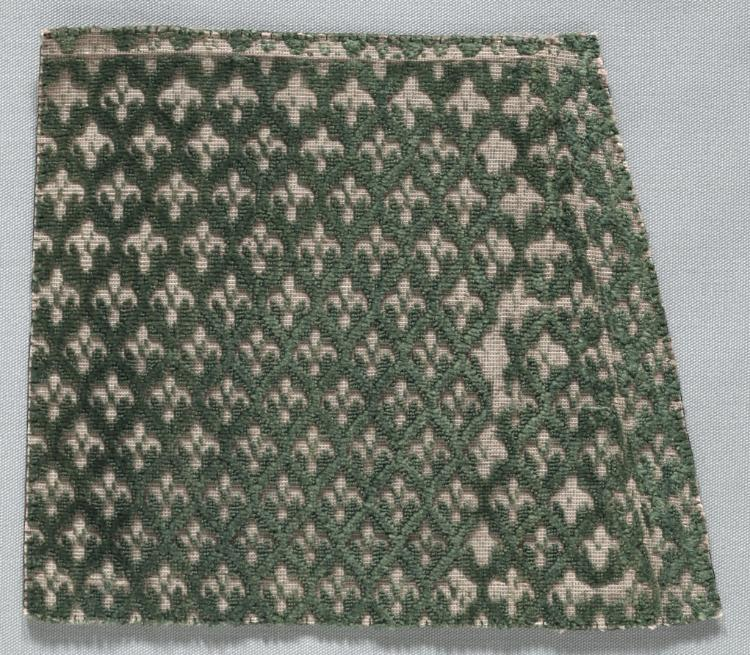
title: Velvet Fragment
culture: Italy, late 16th - early 17th century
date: late 1500s - early 1600s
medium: velvet (cut and uncut); silk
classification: Velvet